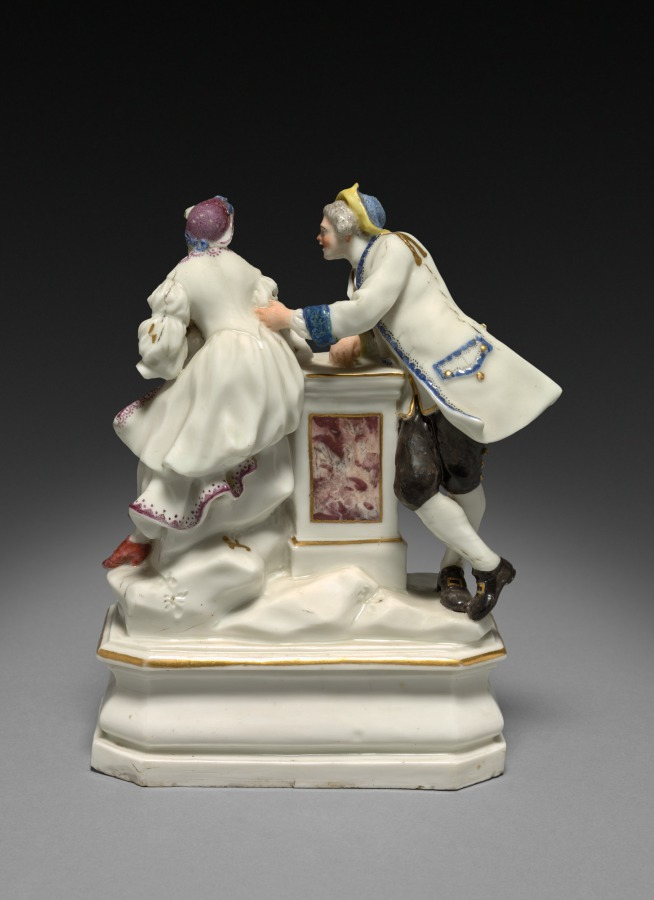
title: Woman and Man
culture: Italy, Naples, Capo di Monte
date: c. 1750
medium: porcelain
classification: Ceramic